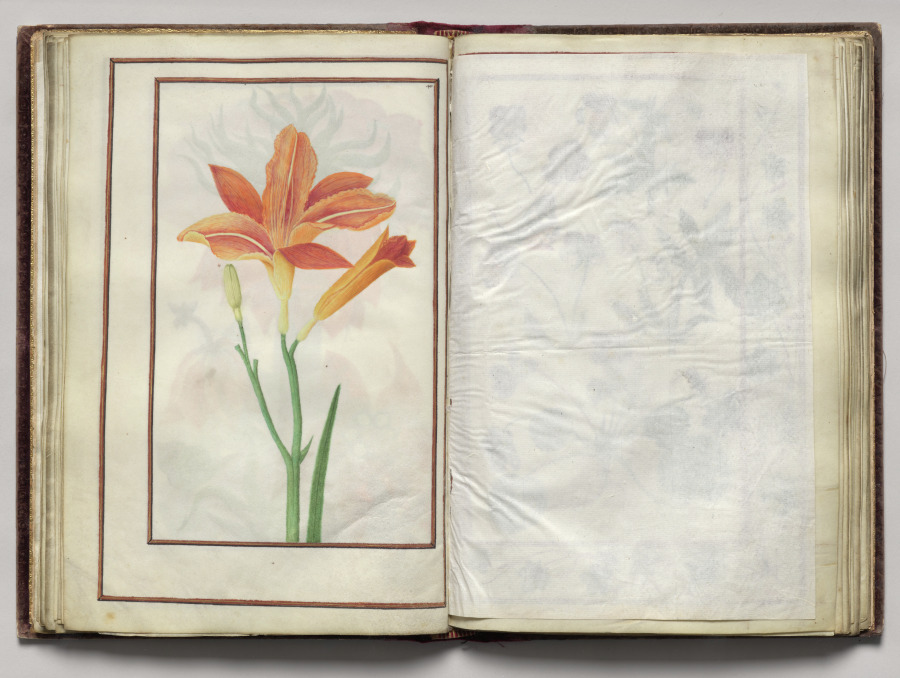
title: Day Lily, folio 20 (verso), from Florilegium (A Book of Flower Studies)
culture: France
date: 1608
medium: watercolor, ink, silver, and gold over occasional traces of pencil, on vellum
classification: Bound Volume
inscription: Dated: Poitiers 1608 (on frontispiece) Signed: On frontispiece in black ink, lower right: Van Kuyk Notation on drawing: Frontispiece: in pencil, lower margin: * élève de Van Kessel, peintre flammand (* in pencil also appears in front of Van Kuyk's name).